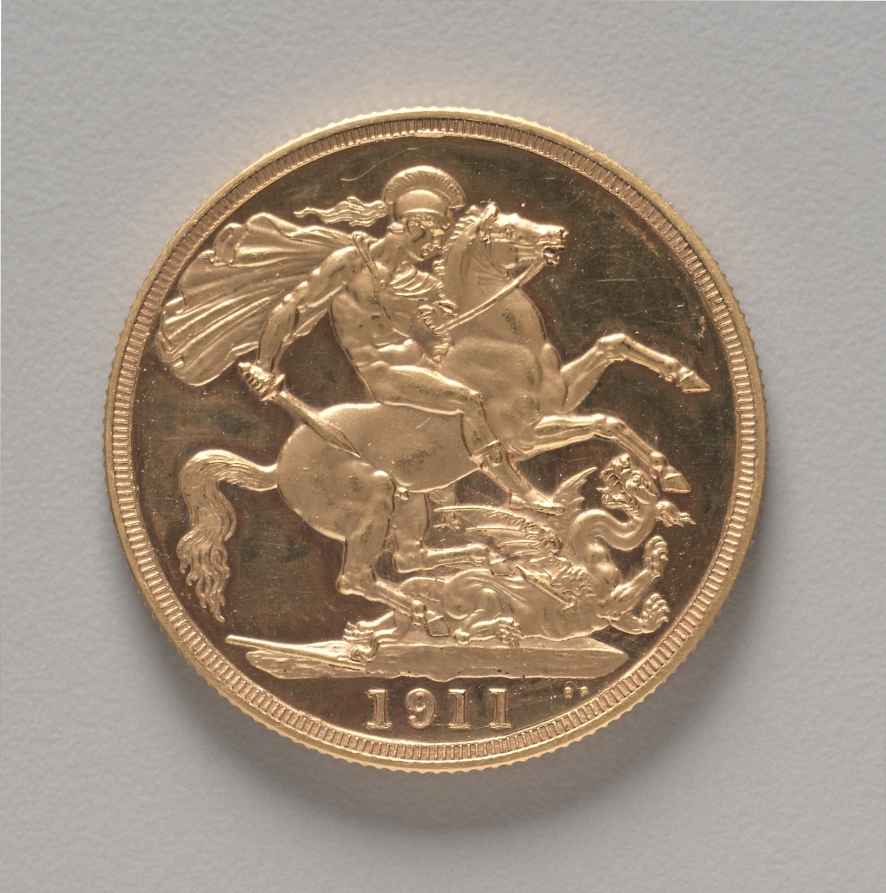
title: Two Pound Piece: St. George and the Dragon (reverse)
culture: England, George V, 1910-1936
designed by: after Benedetto Pistrucci (Italian, 1784–1855)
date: 1911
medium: gold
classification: Coins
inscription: below: 1911.